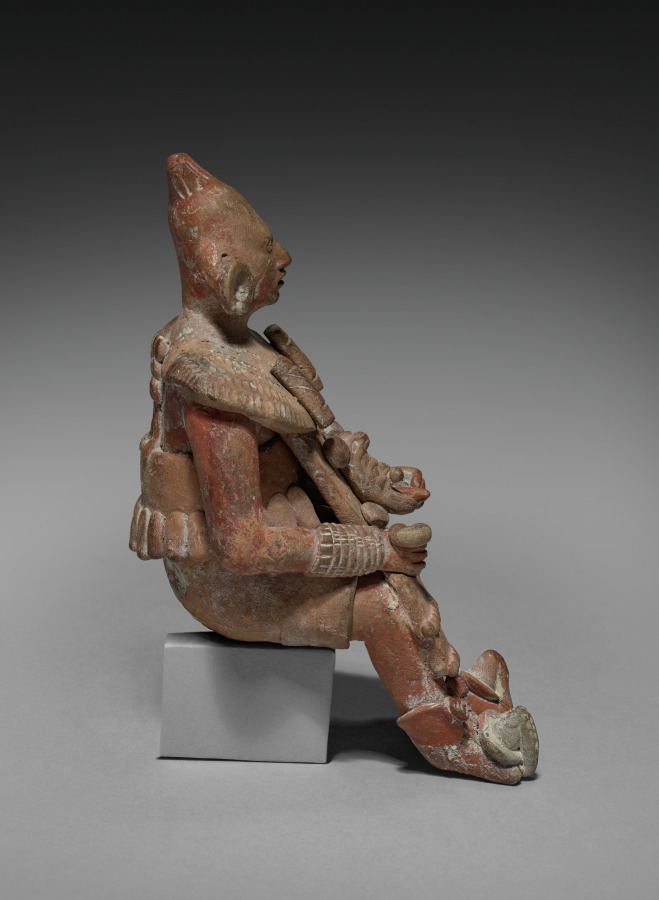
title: Seated Lord with Removable Headdress: Figure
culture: Mesoamerica, Maya, probably Jaina Island, Late Classical period, 7th-9th century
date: 600–800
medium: ceramic and slip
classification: Ceramic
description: The major Maya grave offerings on Jaina Island were ceramic figurines that depict deities and humans in a variety of roles. The seated figure represents a male, perhaps another warrior, who wears a huge zoomorphic headdress. A skeletal face with articulated jaw descends from the headdress to fit as a mask over the figure’s face.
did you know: It is estimated that some 20,000 people were buried on the tiny island of Jaina over a 500-year period.